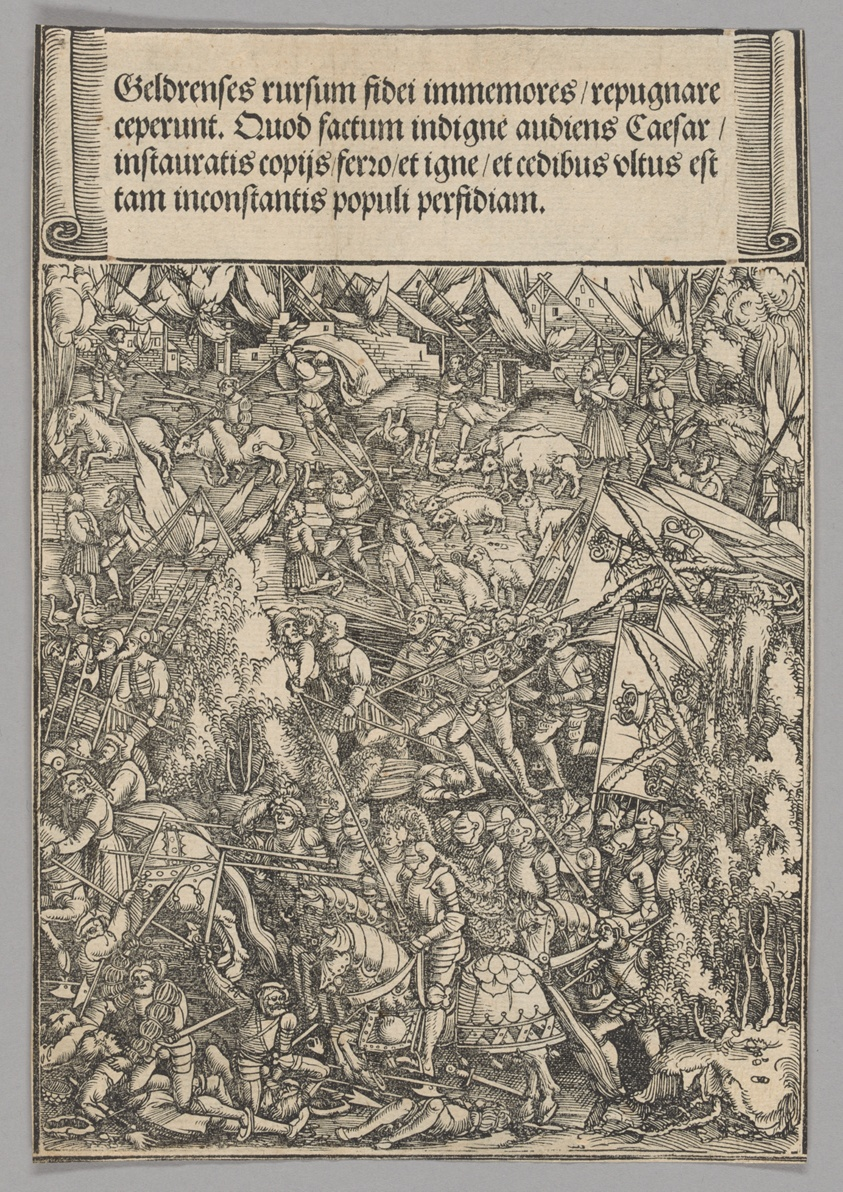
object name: Print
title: Second War with Guelders, plate 19 from Historical Scenes from the Life of Emperor Maximilian I from the Triumphal Arch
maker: Hans Springinklee (German, c. 1495-after 1522); printed by Hieronymus Andreae (German, died 1556)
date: 1515-17, printed c. 1520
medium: Woodcut in black ink on cream laid paper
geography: Germany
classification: print; paper; woodcut; prints and drawing